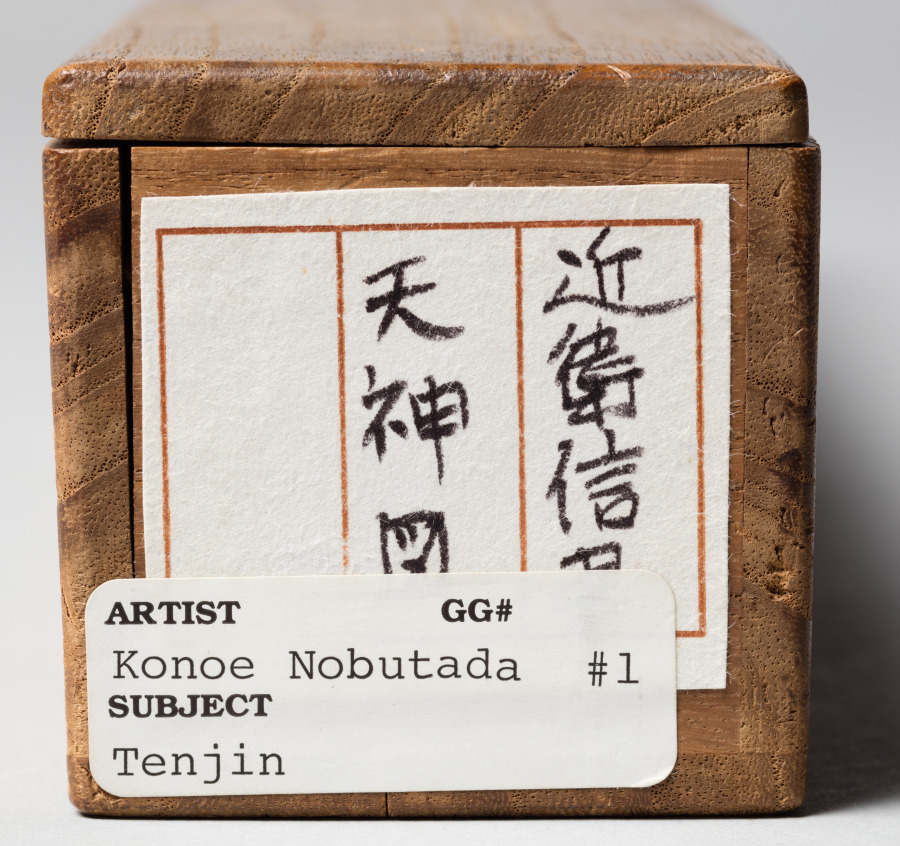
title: Tenjin Traveling to China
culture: Japan, Momoyama period (1573–1615)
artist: Konoe Nobutada (Japanese, 1565–1614)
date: 1610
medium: hanging scroll; ink on paper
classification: Painting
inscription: signed: Nobutada's cipher signature kao inscribed: two poems above, dated Keicho 15